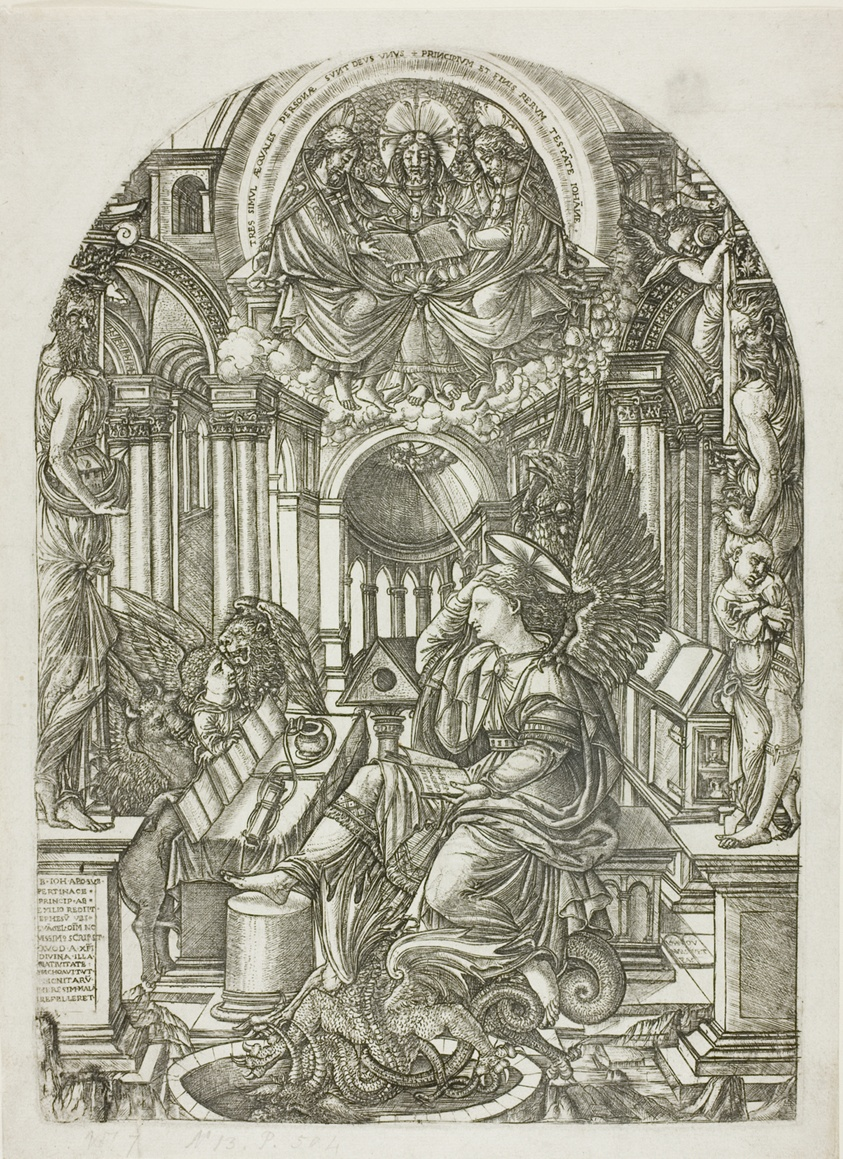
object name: Print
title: St. John on the Island of Patmos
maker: Jean Duvet (French, 1485-after 1561)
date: 1550/60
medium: Engraving in black on ivory laid paper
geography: France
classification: engraving; print; prints and drawing